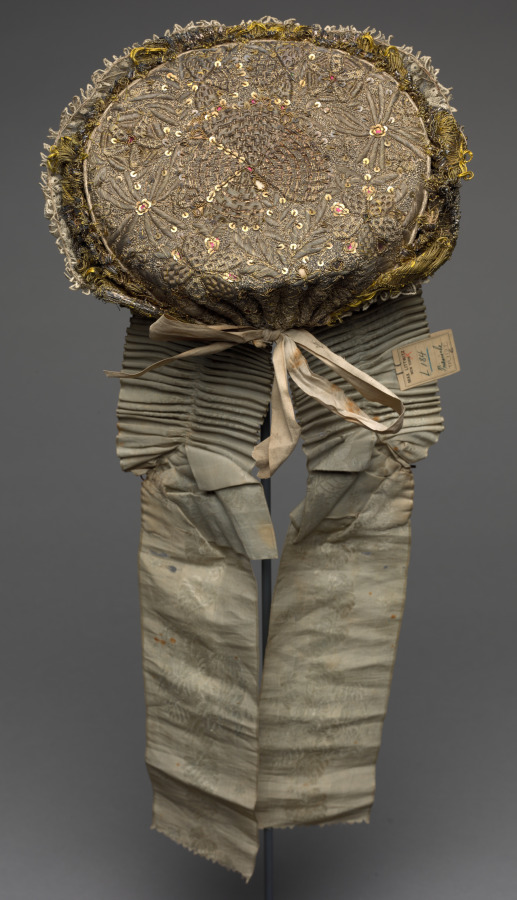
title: Embroidered Headdress (Called "Triesische")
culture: Germany, 18th century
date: 1700s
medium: embroidery, metallic thread and spangles; lace edging and ribbon streamers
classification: Garment